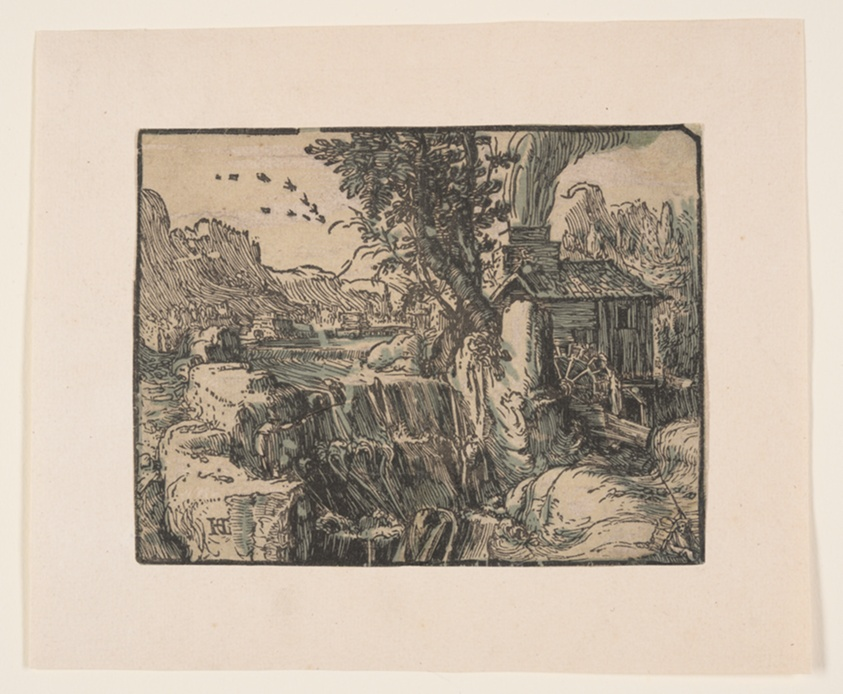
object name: Print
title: Landscape with a Waterfall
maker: Hendrick Goltzius (Dutch, 1558–1617)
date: c. 1600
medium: Chiaroscuro woodcut from three blocks printed in beige and green on ivory laid paper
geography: Netherlands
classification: woodcut; paper; print; prints and drawing